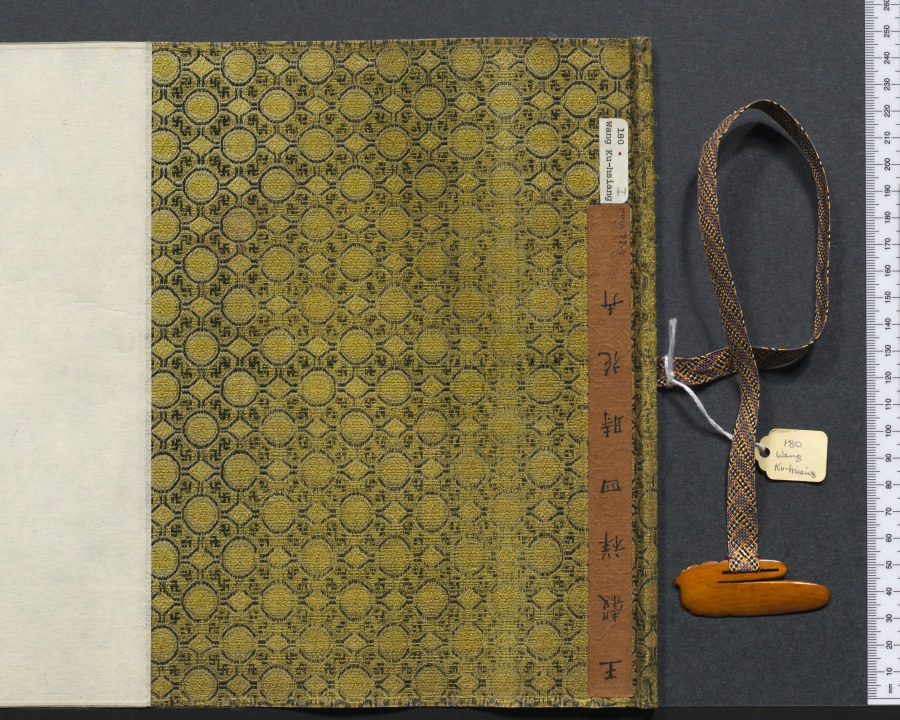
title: Flowers of Four Seasons, with Poems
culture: China, Ming dynasty (1368–1644)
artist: Wang Guxiang (Chinese, 1501–1568)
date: 1531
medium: handscroll; ink and light color on silk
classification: Painting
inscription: Artist's inscription, signature, and 15 seals. Ink Orchids. Sewn as pendants for the man of worth, swaying quiety, fragrance in the valley. [seal] Hsiao-chu ts'un Peony. Wiping his face, the young gentleman Ho [Ho Yen of Wei, Three Kingdoms] appears to have been powdered. His previous life was the perfume-stealing Han Shou [of Chin, 265–419 CE], the fragrance still lingers. [seal] Ts'un-wu chai. Flowering Crab Apple, New Bamboo. Shao-lin [Du Fu, 712–770] had to put down his brush. [Flowering Crab Apple]. Yü-k'o [Wen T'ung, d. 1079) in vain wrote poems about [Bamboo]. [seal] Yu-shih. Lotus Flowers. When she turns her head, half-hidden by a fan, and casts a glance, all the beautiful women become colorless. [seal] K'ang yüeh huai. Loquat. Ripeness in summer. [seal] Lu-chih. Pomegranate Flower. Whenever I remember you I will send my thoughts, but where have you gone--the [skirt] of pomegranate red? [seal] Wu-ho Sheng. Day Lily. Plant the day lily to forget sorrow. [seal] Yu-shih. Chrysanthemum. The untrammelled joy at the eastern fence. [seal] Lu-chih. Begonia. Comparing it to the beauties of Spring, and spreading them out as trimming for the stone steps. [seal] Yu-shih. Hibiscus. In recent years I have always enjoyed looking at flowers; instead of dark red I preferred pink ones. [seal] Jen-sheng i-lou. Narcissus, Camellia. The jade girdle left behind at Lo River. [Narcissus]. The precious pearls glitter before Spring. [Camellia]. [seal] Lu-chih. Heavenly Bamboo (Nandina domestica). A single branch in the wintry season. [seal] K'ang yüeh huai. Plum. Fragrant snow in the Lo-fou Mountains. [seal] Ts'un-wu chai. In the eleventh lunar month of the hsin-mao year of the Jiaqing era [1531], [I] imitated the boneless style of Yüan masters in sketching from life. Guxiang [seals] Yu-shih; Lu-chih. Translated by Wai-kam Ho/Lingyun Shih Liu (1980)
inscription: 2 colophons and 23 additional seals: 1 colophon dated 1632, and 2 seals of Li Jih-hua [Li Rihua] 李日華 (1565–1635); 1 colophon and 2 seals of Xiang Shengmo 項聖謨 (1597–1658); 3 seals of Liang Qingbiao 梁清標 (1620–1691); 6 seals of the Jiaqing 嘉慶 emperor (r. 1796–1820); 9 seals of Ch'eng Ch'i [Cheng Qi] 程琦 (1911–1988)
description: In this painting, flowers are loosely arranged by the seasons: narcissus and peony represent early spring; yellow loquat and lotus, summer; chrysanthemum, autumn; and the plum and evergreen bamboo, winter. The artist added to each flower a poetic line of calligraphy associating each plant with a historic or legendary figure. For example, the chrysanthemum, along with the line “The untrammeled joy at the eastern fence,” refers to the poet Tao Yuanming (died AD 427) who enjoyed chrysanthemums at the eastern fence in his garden. The scroll illustrates Wang Guxiang’s mastery of free brushwork, combining light monochrome ink with transparent colors. In his inscription, Wang says he used the “boneless” style without outlines as developed during the Yuan dynasty (1279–1368). Wang was a native of Changzhou, a city in southeast China known for its rich flora and fauna, and flower-and-bird painting tradition.